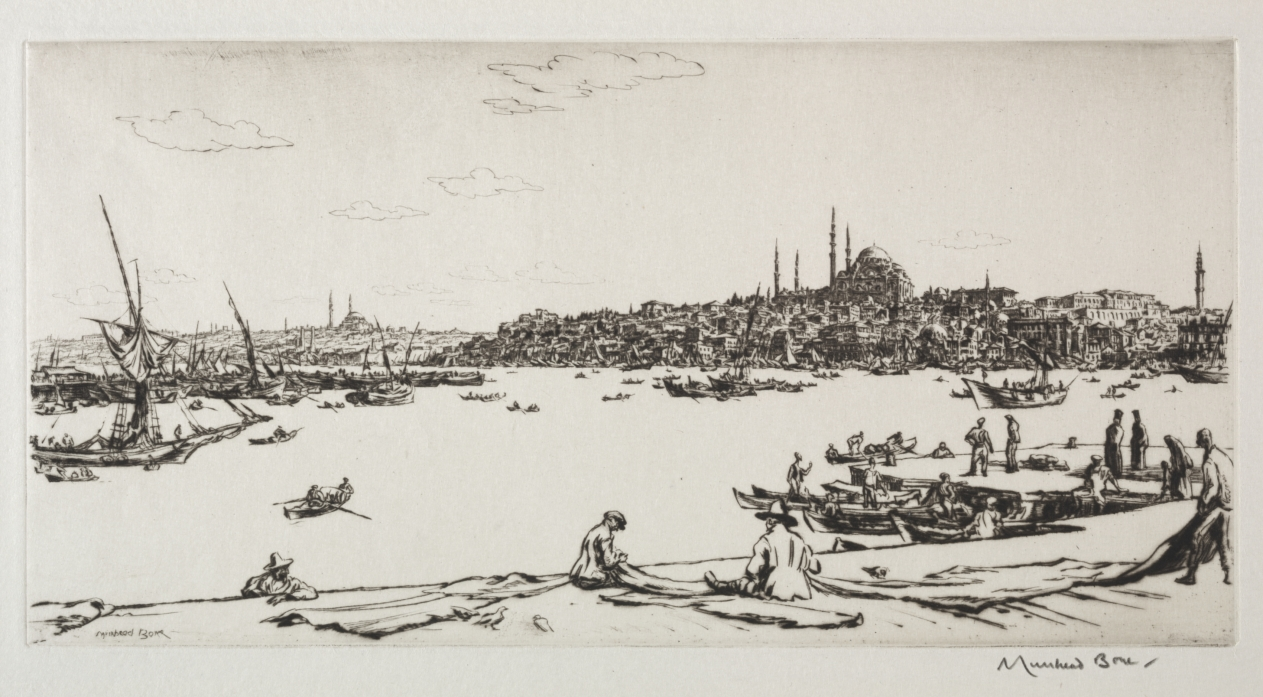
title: Constantinople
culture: England, 20th century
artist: Muirhead Bone (British, 1876–1953)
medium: drypoint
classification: Print